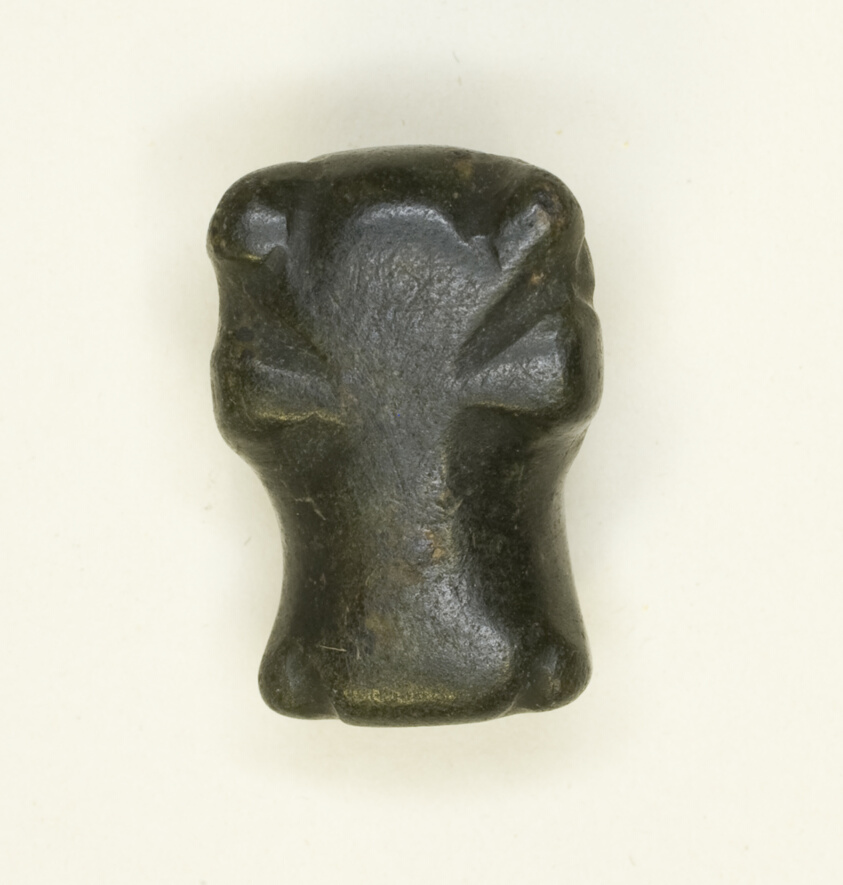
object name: Costume and Accessories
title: Amulet of a Hippopotamus Head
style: egyptian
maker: Egyptian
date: Middle Kingdom, Dynasty 12 (about 1985–1773 BCE)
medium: Serpentine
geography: Egypt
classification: amulet; jewelry; unidentified; ancient art; costume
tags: Hippopotamus, animals